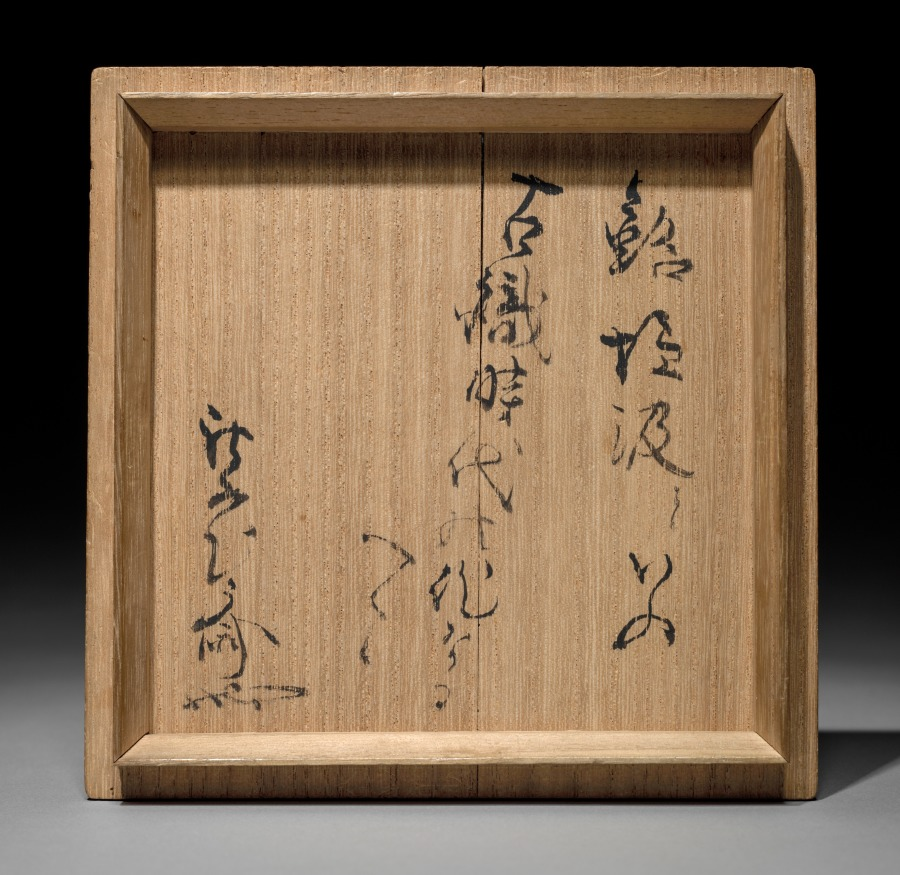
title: Tea Bowl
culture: Japan, Edo period (1615–1868)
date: 1600s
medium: stoneware with natural ash glaze (Shigaraki ware)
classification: Ceramic